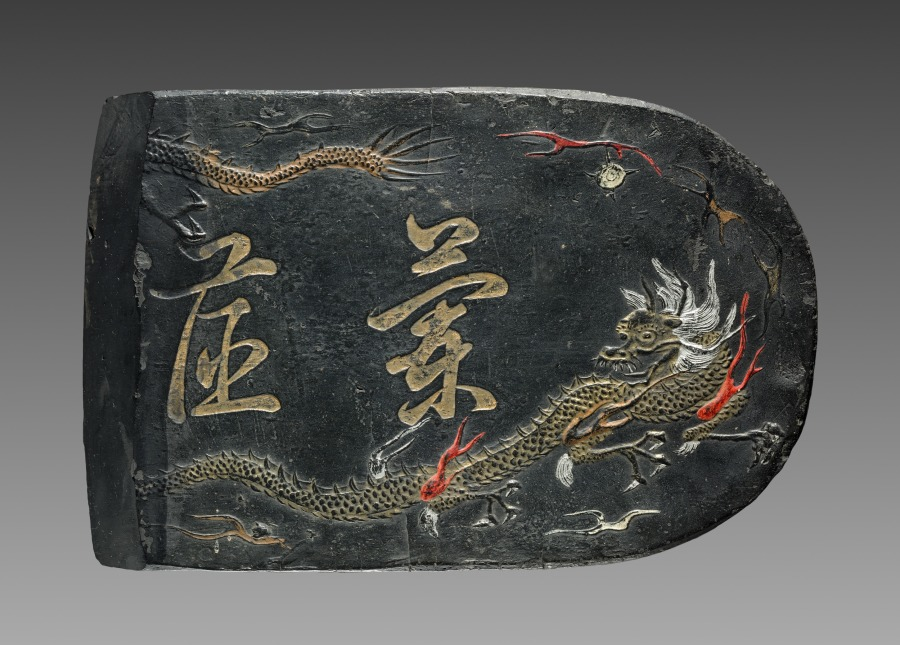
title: Ink Cake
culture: China, Ming dynasty (1368–1644)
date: 1368–1644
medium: ink cake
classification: Miscellaneous